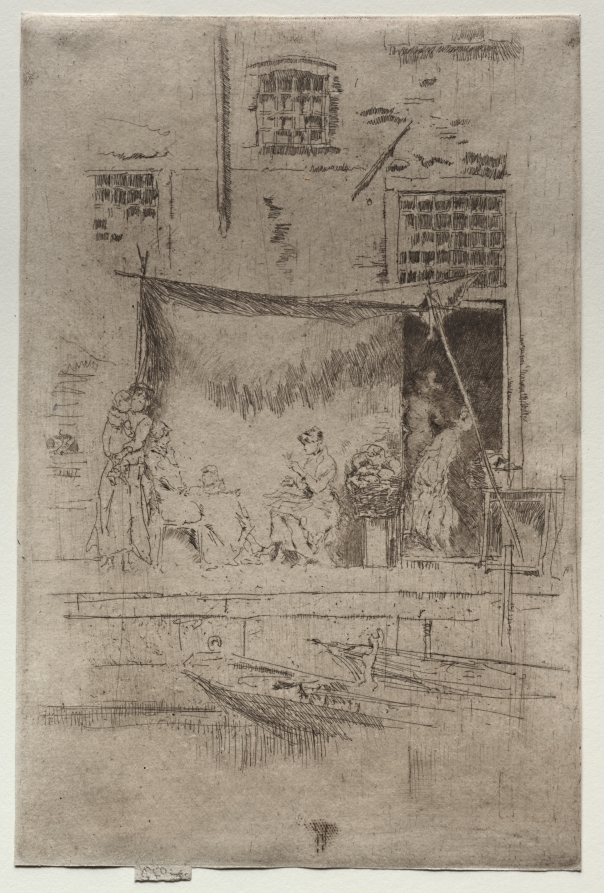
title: The Fruit Stall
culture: America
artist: James McNeill Whistler (American, 1834–1903)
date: 1879–80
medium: etching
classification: Print